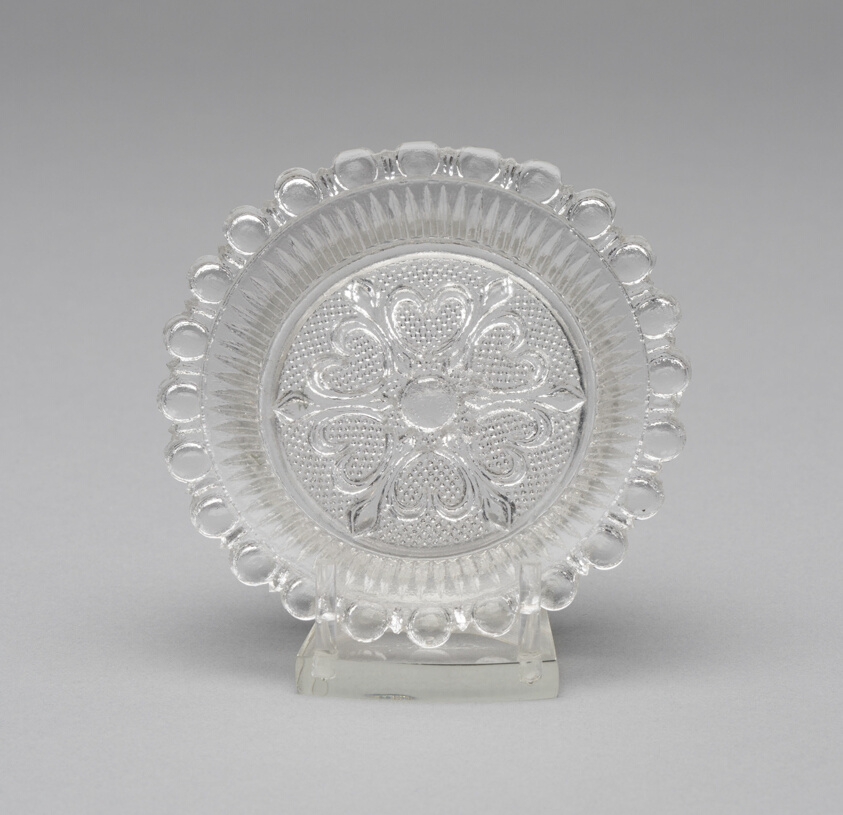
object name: Glass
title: Cup plate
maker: Artist unknown (American, 19th century); Midwest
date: c. 1835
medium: Pressed glass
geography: Midwest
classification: plate (general, dish); glass; american decorative arts; american arts; decorative arts